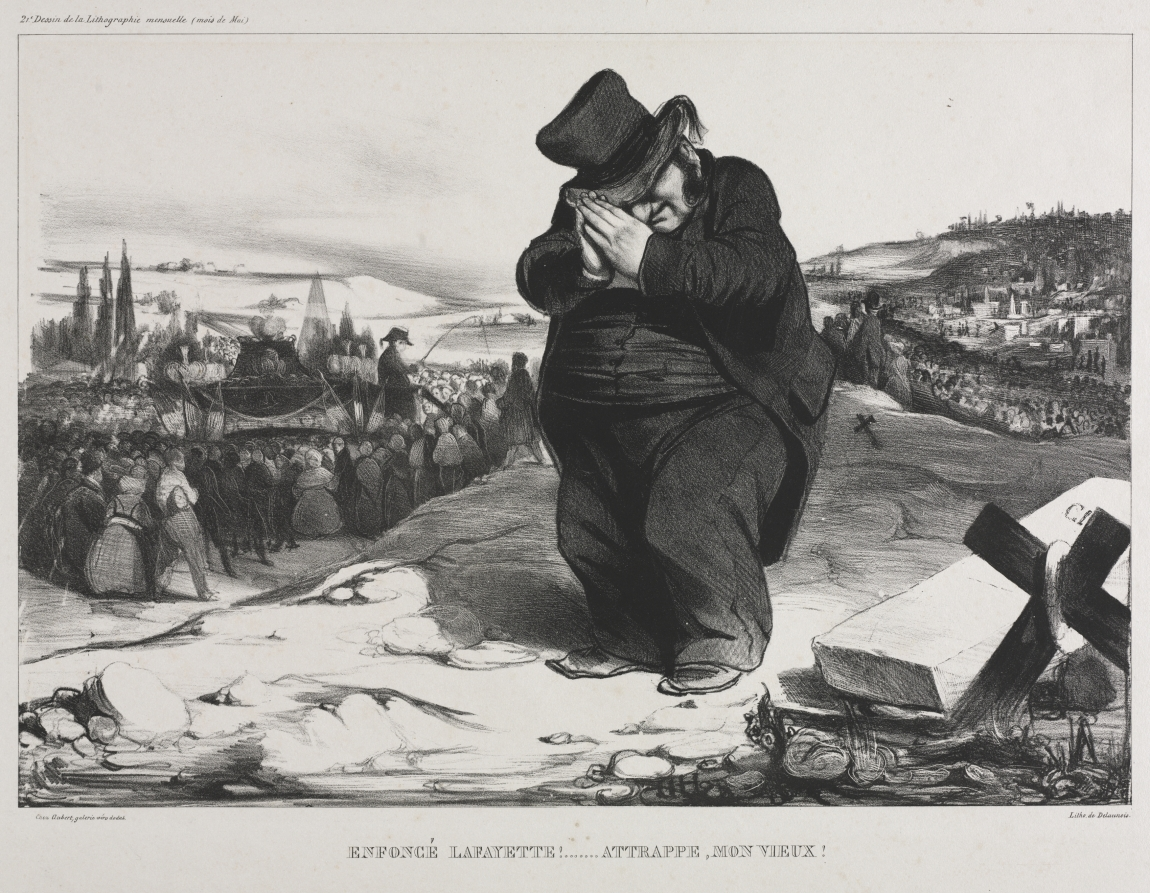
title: Failed Lafayette! It Serves You Right, My Old Friend!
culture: France, 19th century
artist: Honoré Daumier (French, 1808–1879)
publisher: Aubert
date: 1834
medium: lithograph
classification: Print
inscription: Upper margin, printed: 21e Dessin de la Lithographie mensuelle (mois de Mai) ; lower margin, printed: Chez Aubert, galerie vero dodat. / Lith. de Delaunois ; Below image, printed: ENFONCÉ LAFAYETTE!.......ATTRAPPE, MON VIEUX!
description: This print was published as plate 22 from The Monthly Association (l’Association Mensuelle), a special edition of La Caricature.